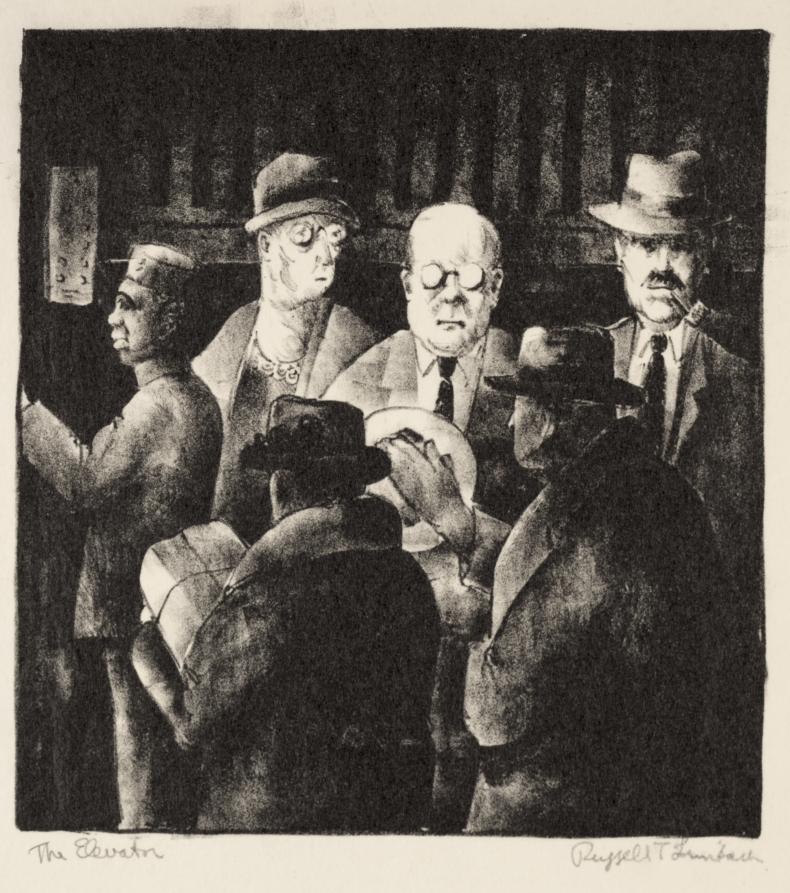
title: The Elevator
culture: America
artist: Russell T. Limbach (American, 1904–1971)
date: c. 1928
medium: lithograph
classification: Print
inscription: In graphite, recto: "The Elevator Russell T. Limbach"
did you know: The Cleveland artist Russell Limbach made this print during a skyscraper building boom in downtown Cleveland that included the construction of Terminal Tower.